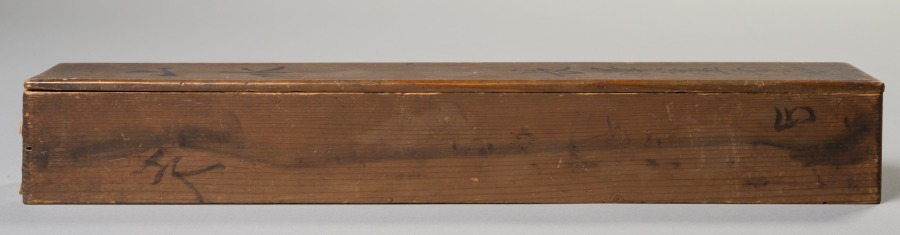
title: Mountains and Distant Boats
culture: Japan, Edo period (1615–1868)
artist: Nagasawa Rosetsu (Japanese, 1754–1799)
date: late 1700s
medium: hanging scroll; ink and slight color on paper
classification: Painting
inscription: Signed: 蘆雪; Sealed: 引裾